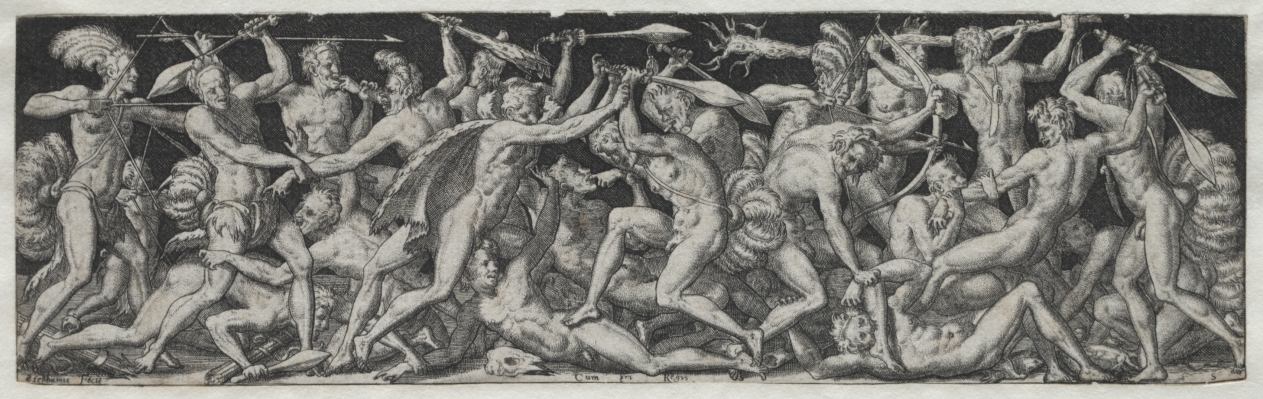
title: Combats and Triumphs No. 7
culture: France, 16th century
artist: Etienne Delaune (French, 1518/19-c. 1583)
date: c. 1550–72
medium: engraving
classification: Print